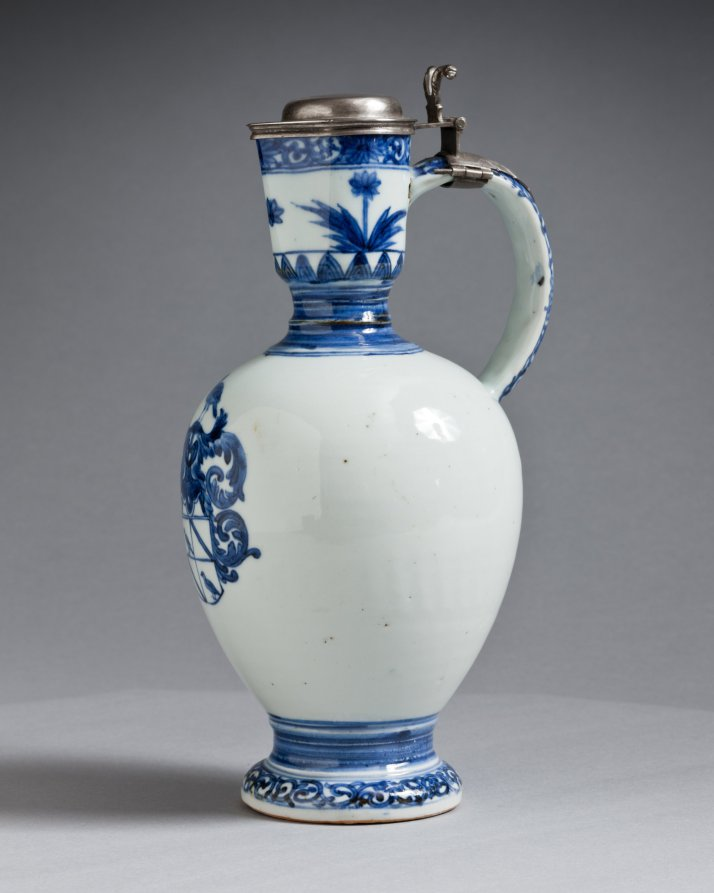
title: Jug with Silver Mounts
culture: Japan, Edo period (1615–1868)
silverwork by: Barent van Leeuwen (Dutch, 1637–1682)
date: c. 1662–76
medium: porcelain with underglaze blue decoration and silver mounts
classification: Ceramic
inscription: [on silver]: town mark for Amsterdam; lion rampant crowned (alloy mark for 0-934 silver); d (date letter for 1666), maker's mark of Barent van Leeuwen.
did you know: The coat of arms on this jug are those of the Valckenier family, active in the Dutch East India Company.